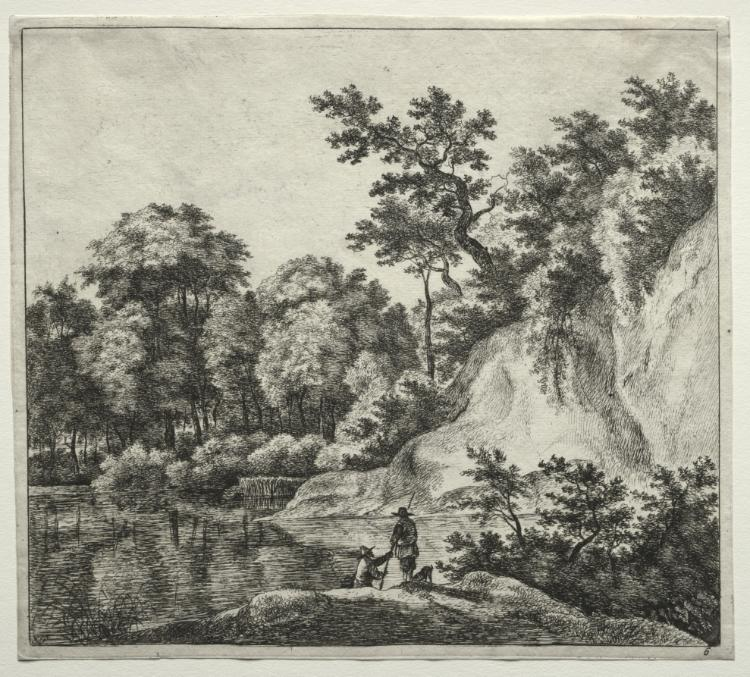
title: The Rock Bathed by the River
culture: Netherlands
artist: Jan Hackaert (Dutch, 1629–c. 1700)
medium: etching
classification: Print